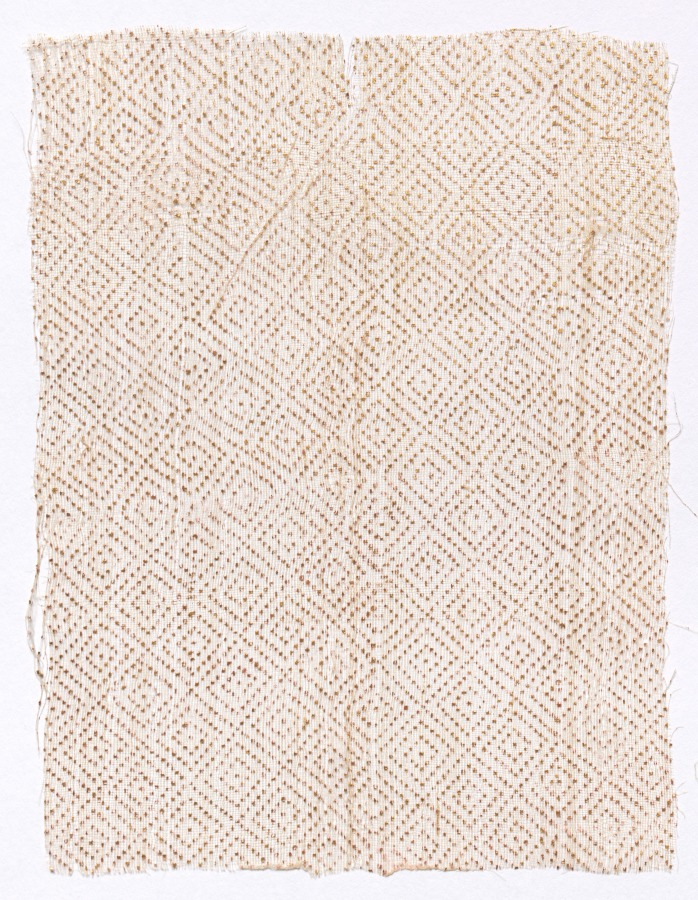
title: Fragment of Draped Court Apparel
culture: India, Rajasthan ?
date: 1800s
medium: Block printed with gold leaf (varak) on undyed plain weave cotton muslin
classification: Textile